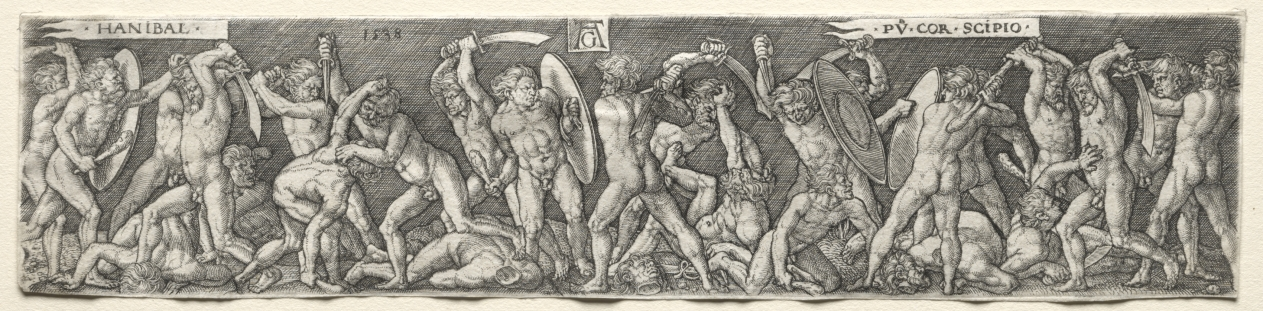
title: Hannibal Fighting Scipio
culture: Germany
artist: Heinrich Aldegrever (German, 1502–1555/61)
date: 1538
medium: engraving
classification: Print